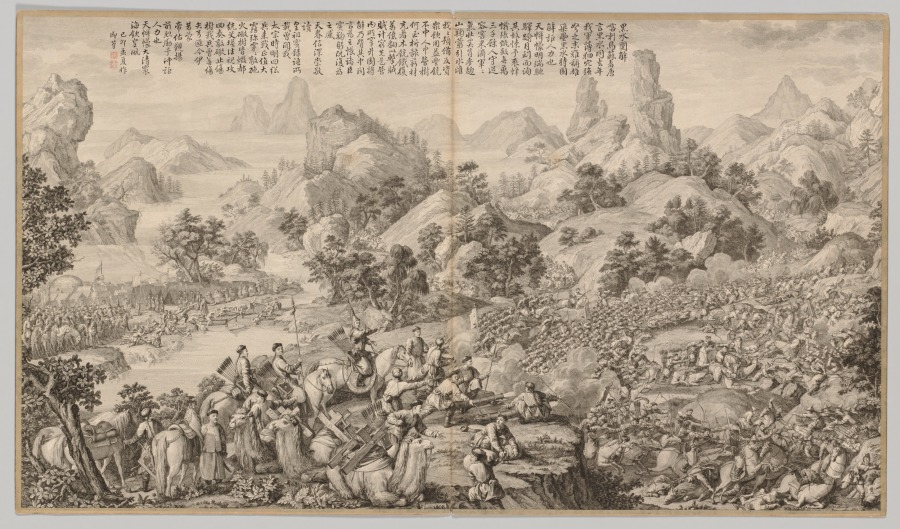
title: Breaking Through the Siege at Hesui: from Battle Scenes of the Quelling of Rebellions in the Western Regions, with imperial Poems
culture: China, Qing dynasty (1644–1911), Qianlong reign (1736–95)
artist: Giuseppe Castiglione (Italian, 1688–1766)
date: c. 1765–74; poem dated 1759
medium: etching, mounted in album form, 16 leaves plus two additional leaves of inscriptions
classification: Print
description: This set of etchings was commissioned by Emperor Qianlong to record in pictorial terms the courage of his generals and soldiers in quelling the rebellions in the Western Regions. Qianlong added his own poem to each of the etchings, indicating his appreciation and pride in this demonstration of military might. "Western Regions" refers to the present-day Xingjiang province, often described in Western writing as "Central Asia."